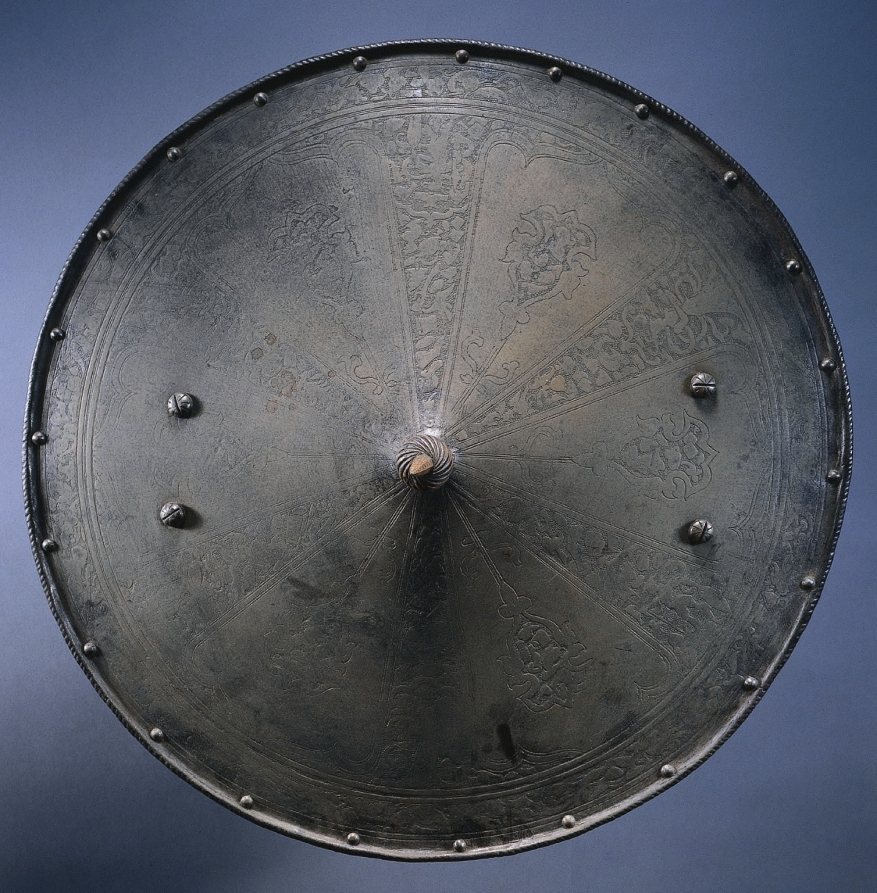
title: Round Shield (Rondache)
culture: North Italy, 16th century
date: c. 1550–1600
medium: steel, etched panels, roped border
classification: Arms and Armor